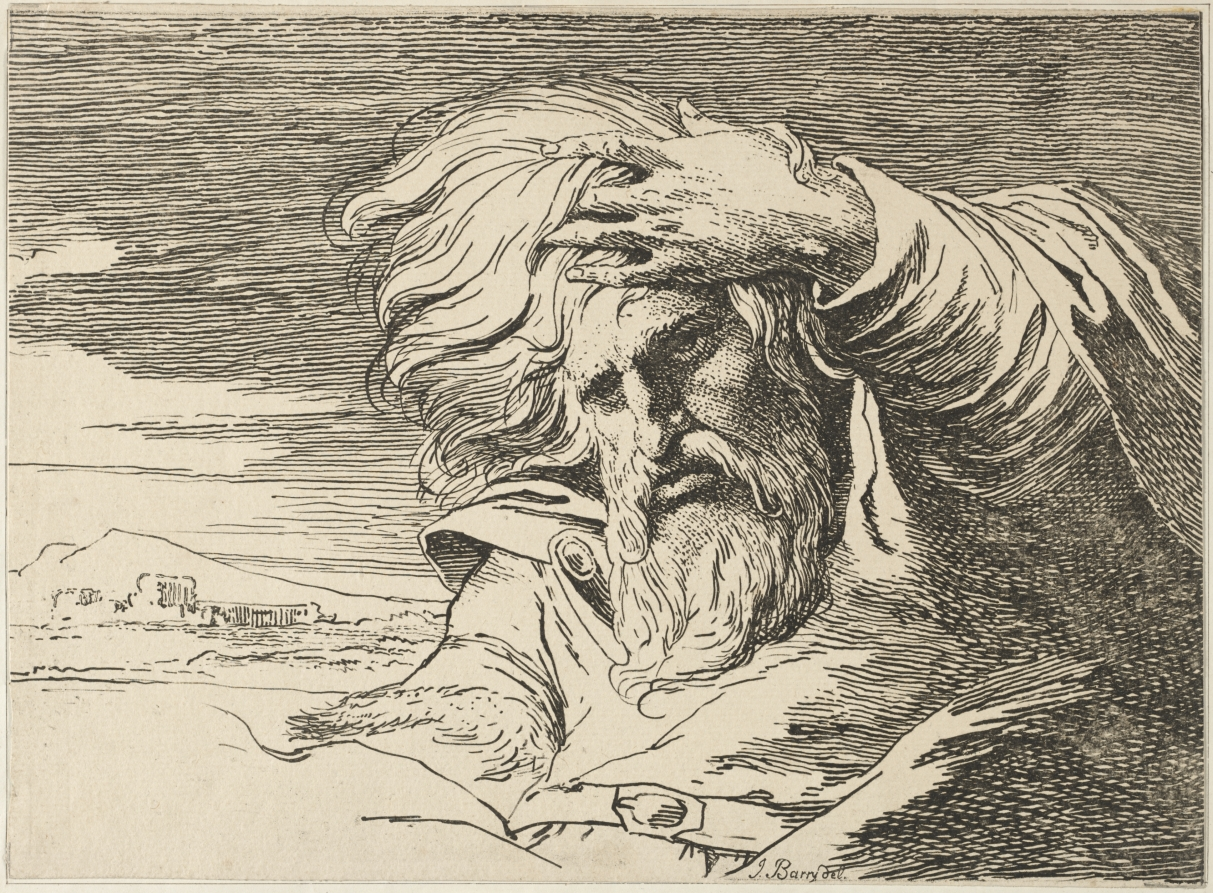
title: Eastern Patriarch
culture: England, early 19th Century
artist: James Barry (British, 1741–1806)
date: 1803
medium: lithograph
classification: Print